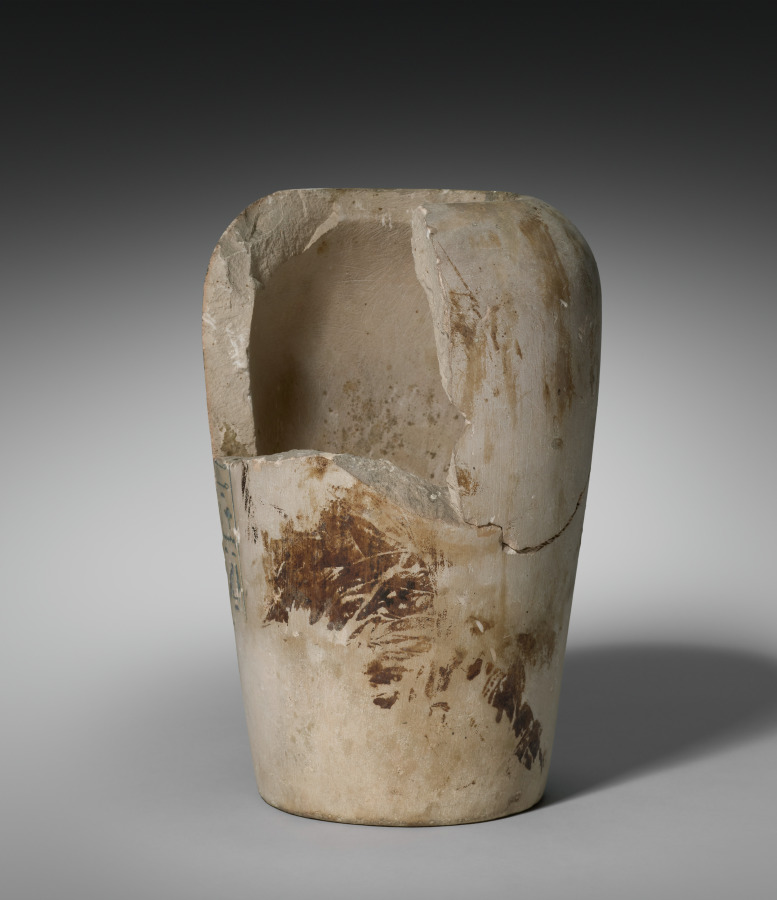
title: Canopic Jar with Lid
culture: Egypt, New Kingdom (1540–1069 BCE), Dynasty 18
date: 1540–1296 BCE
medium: limestone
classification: Funerary Equipment